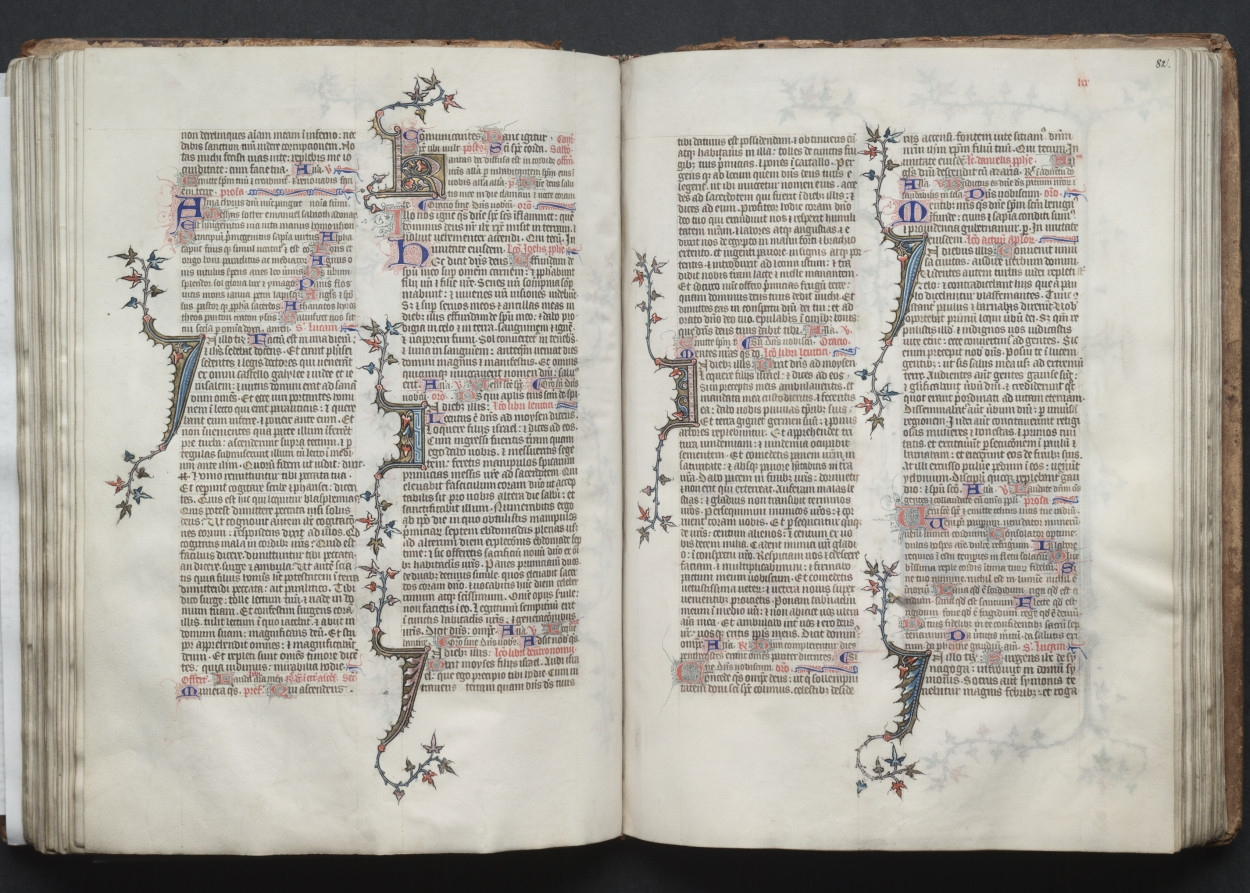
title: The Gotha Missal: Fol. 82r, Text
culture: France, Paris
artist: Master of the Boqueteaux (French)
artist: and Workshop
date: c. 1375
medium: ink, tempera, and gold on vellum; blind-tooled leather binding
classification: Bound Volume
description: The style and quality of this manuscript's decoration is typical of deluxe Parisian books made for aristocratic or royal patrons. Most of the book's decoration appears to be the work of the Master of the Boqueteaux, an artist active at the court of King Charles V (died 1380). His style was apparently shared by a number of book illuminators working in and around Paris. It is very possible that the Gotha Missal belonged to Charles V, but is not provable because the manuscript has no royal portraits and lacks a colophon. Given the book's magnificent decoration, however, it would seem that it was produced for a Valois prince, if not for the king himself. The manuscript receives its name from the German dukes of Gotha, its later owners.